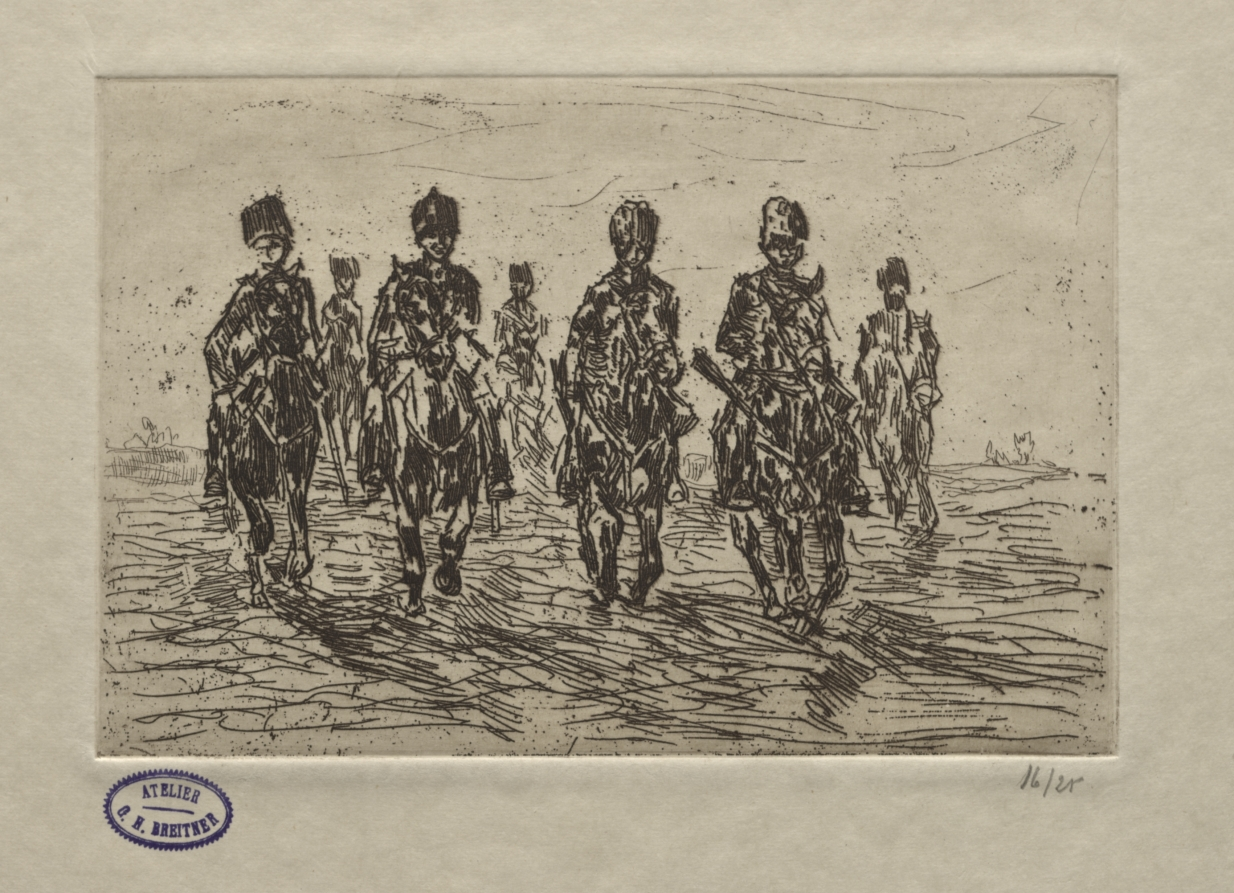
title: Cavalry Scene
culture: Netherlands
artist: George Hendrik Breitner (Dutch, 1857–1923)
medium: etching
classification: Print